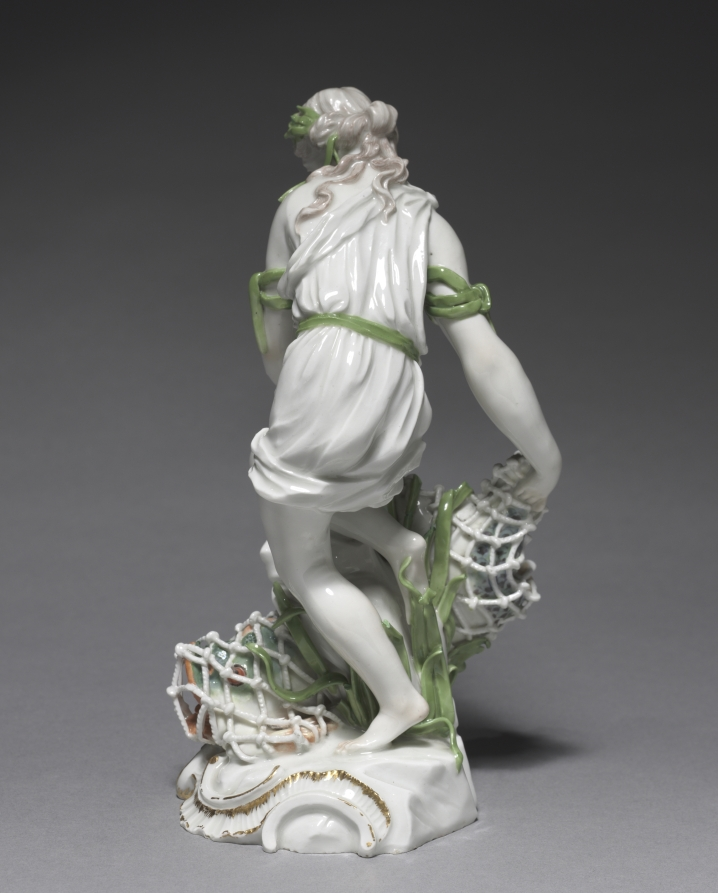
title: Fisherwoman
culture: Germany, 18th century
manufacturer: Ludwigsburg Porcelain Factory (German)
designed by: Johann Christian Wilhelm Beyer (German, 1725–1806)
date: c. 1765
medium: porcelainwith enamel and gilt decoration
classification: Ceramic